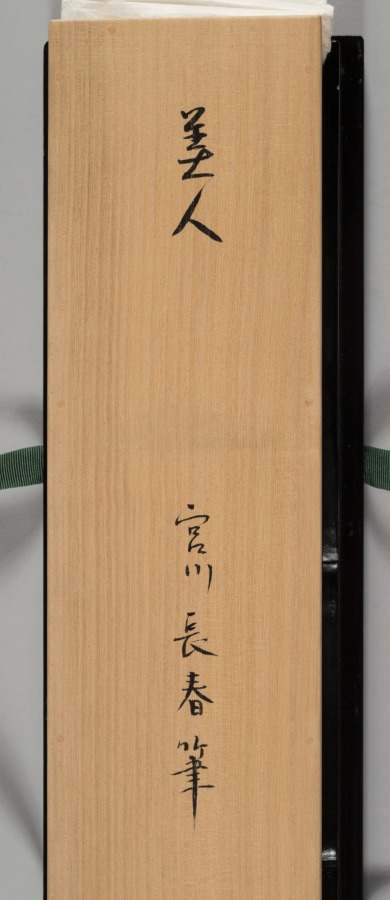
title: Spring Dancers (Manzai)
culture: Japan, Edo period (1615–1868)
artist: Miyagawa Chōshun (Japanese, 1683–1753)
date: early to mid-1700s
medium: hanging scroll; ink and color on paper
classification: Painting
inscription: Artist's signature and gourd-shaped seal lower right corner.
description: Manzai is the Japanese term for wandering comic dancers. The painting depicts one of the traditional pleasures of the spring season.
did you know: One performer is playing a hand-held drum, like CMA 1918.349.